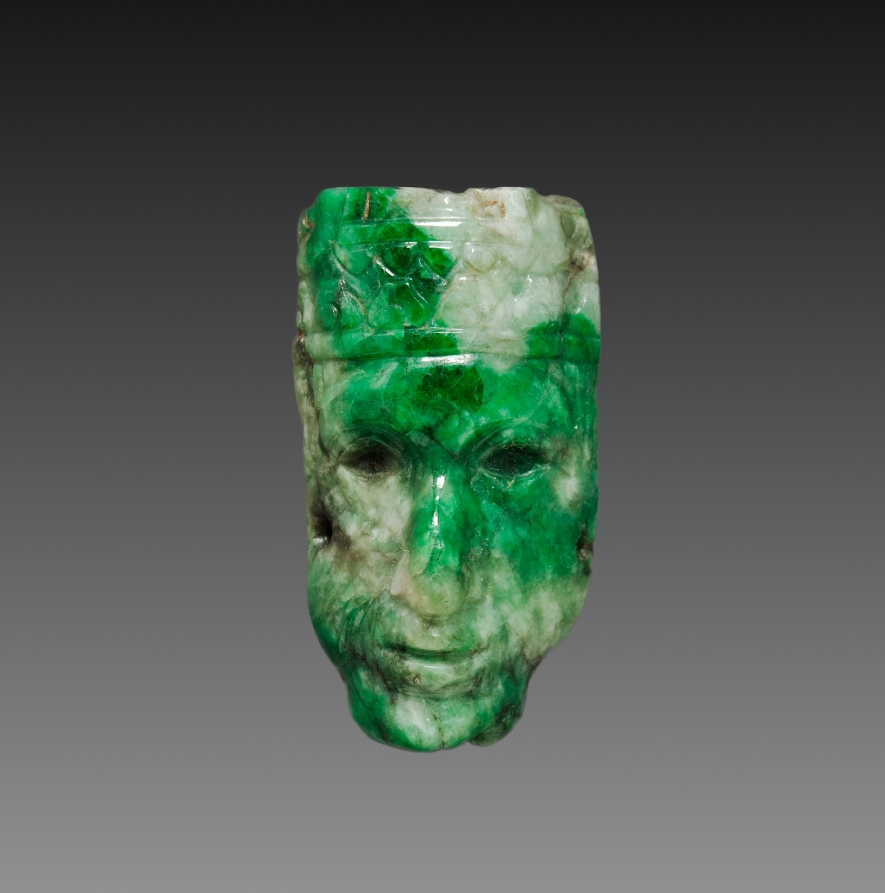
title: Head Ornament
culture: Honduras, Copan, Maya, 7th-10th Century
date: c. 600–900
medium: jade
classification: Jade